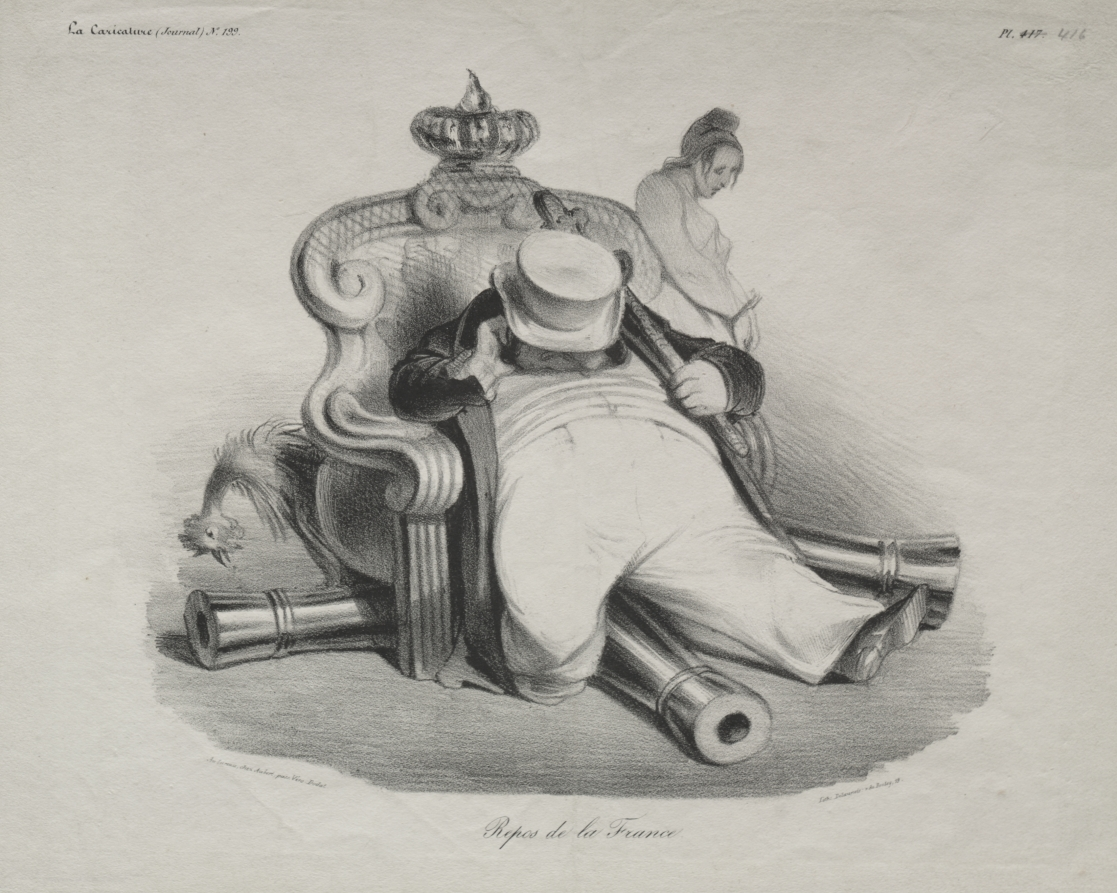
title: The Repose of France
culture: France, 19th century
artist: Honoré Daumier (French, 1808–1879)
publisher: Aubert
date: 1834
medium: lithograph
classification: Print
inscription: Below image printed: Repos de la France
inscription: Upper margin, printed: La Caricature (Journal) No. 199 / Pl. 417 [crossed out in pencil] ; pencil: 416 / 65 ; lower margin, printed: Au bureau, chez Aubert, pass. Vèro -Dodat / Lith: Delaunois: r. du Bouloy, 19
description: This print was published in the journal La Caricature (No. 199 ) as plate 417.